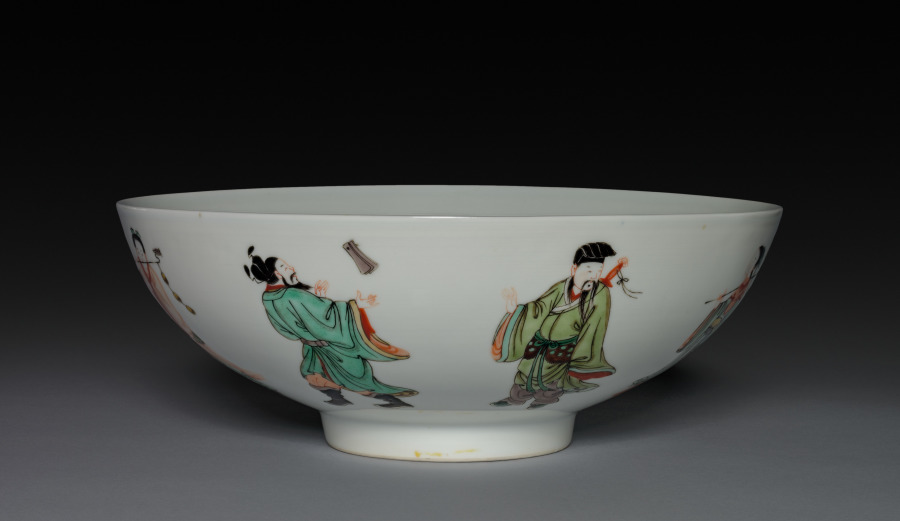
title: Bowl with Eight Immortals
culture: China, Jiangxi province, Jingdezhen kilns, Qing dynasty (1644-1911), Kangxi reign (1662-1722)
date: 1662–1722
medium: porcelain with famille verte overglaze enamel decoration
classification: Ceramic